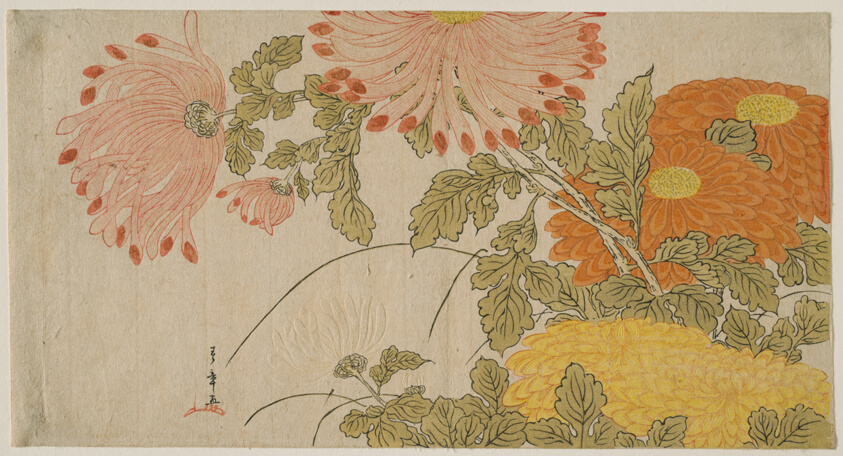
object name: Print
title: Chrysanthemums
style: Japanese (culture or style)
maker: Katsukawa Shunsho 勝川 春章; Japanese, 1726-1792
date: early 1780s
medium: Color woodblock print; surimono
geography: Japan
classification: woodblock print; print; asian art